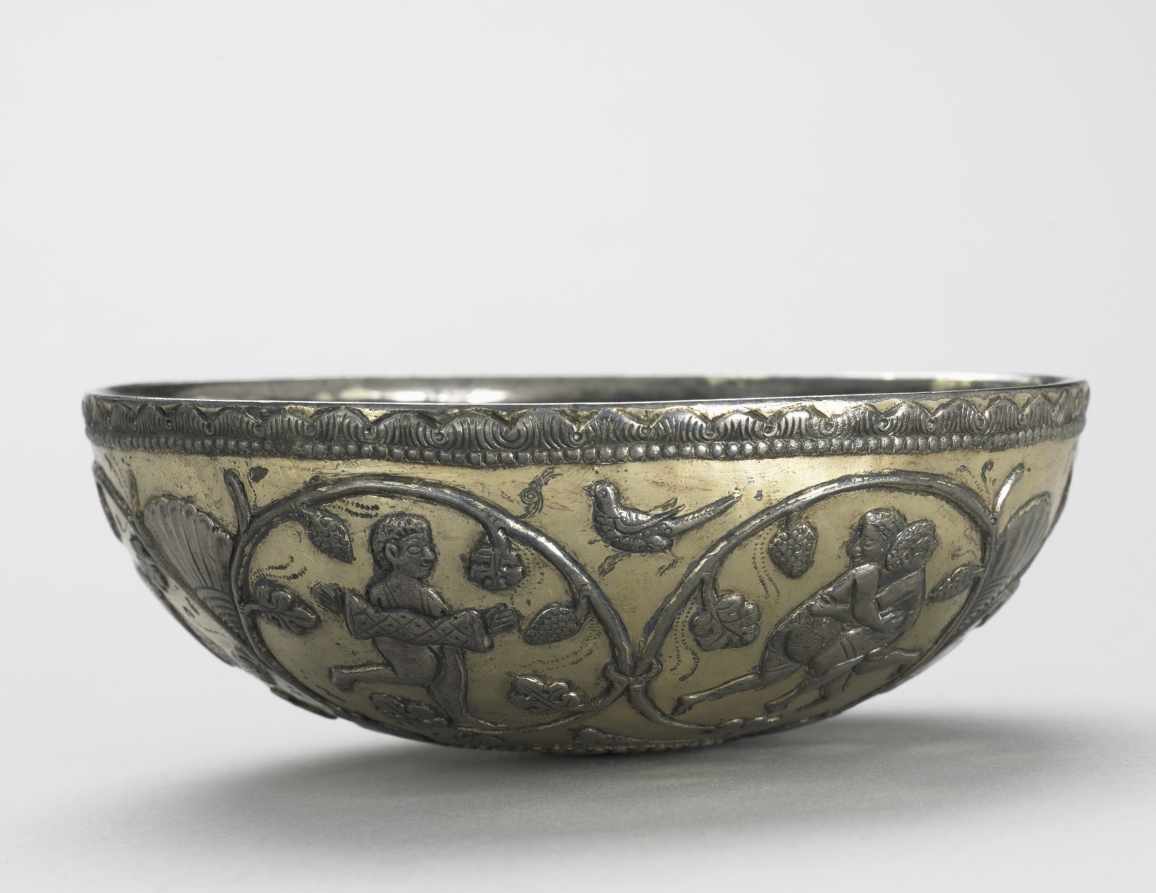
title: Bowl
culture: Iran, Sasanian Empire (224–651 CE)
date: 500–700 CE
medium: silver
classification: Metalwork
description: Every good Zoroastrian was supposed to spend one-third of his day farming; one-third philosophizing; and one-third eating, resting, and at pleasure. The abundance of Sasanian luxury goods is evidence of the importance accorded the last third of the day.